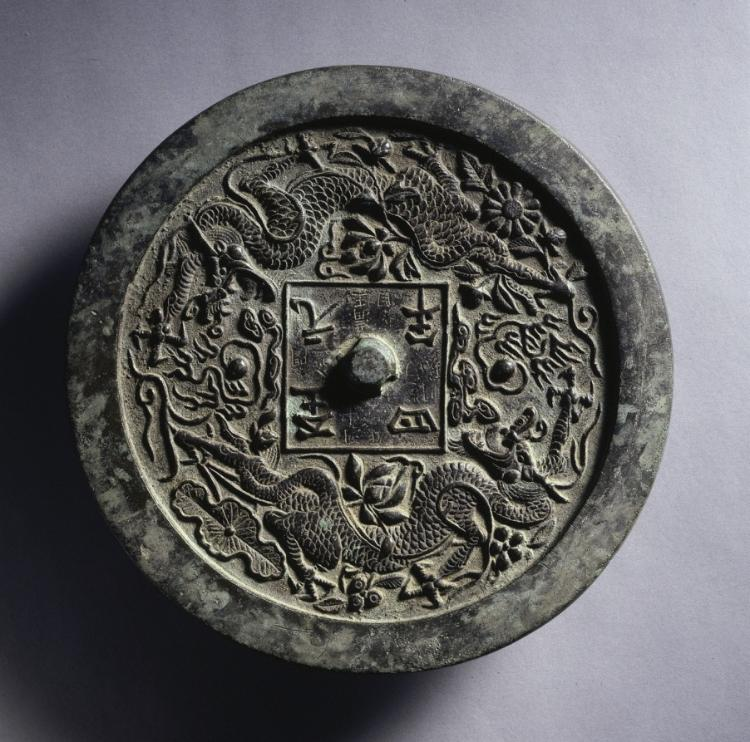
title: Mirror with Twin Dragons and Lotus Blossoms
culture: China, Shanxi province, Hezhong, Yuan dynasty (1271-1368)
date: 1338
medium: bronze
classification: Metalwork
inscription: 河中府馬溝玉家自家門人監造白銅鏡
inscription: 至元四年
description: The mirror features a pair of dragons poised to seize flaming pearls. Blossoms like lotus and chrysanthemum emerge among the dragons. Surrounding the central knob of the mirror is a square enclosing the characters "至元四年 (Fourth Year of Zhiyuan, 1338)." The square also encompasses a barely legible engraving which identifies the workshop in today’s Shanxi province: "White bronze mirror cast under the supervision of retainers from the house of Ma Gouyu in the prefecture of Hezhong."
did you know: This intricate mirror was donated in honor of Sherman Lee, the museum's longest tenured director.